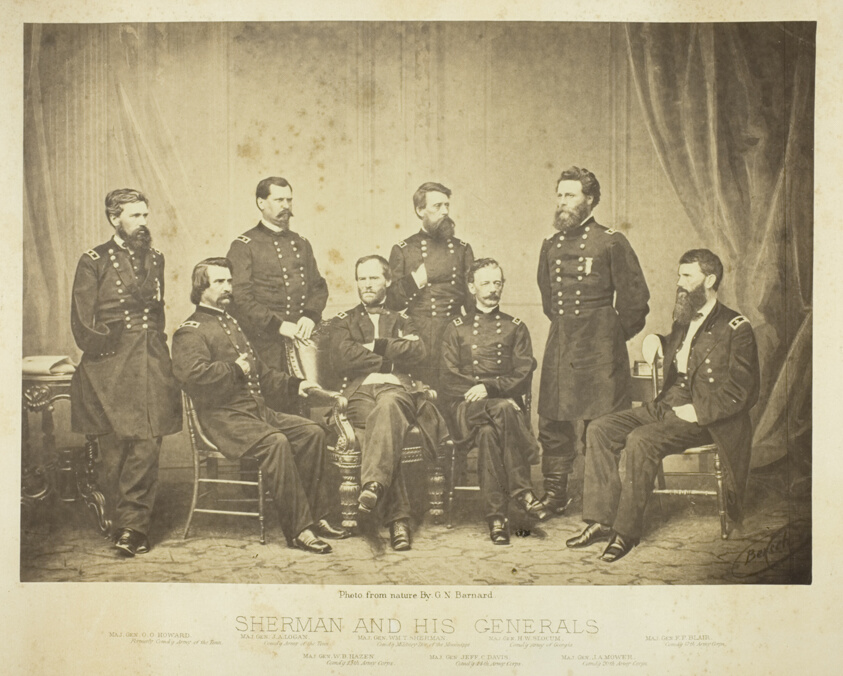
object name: Photograph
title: Sherman and His Generals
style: 19th century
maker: George N. Barnard (American, 1819–1902)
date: 1865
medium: Albumen print, plate 1 from the album "Photographic Views of the Sherman Campaign" (1866)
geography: United States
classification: albumen silver print; photographic process; photography; photograph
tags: Collected by Hugh Edwards, Sherman's Campaign 1866, documentary